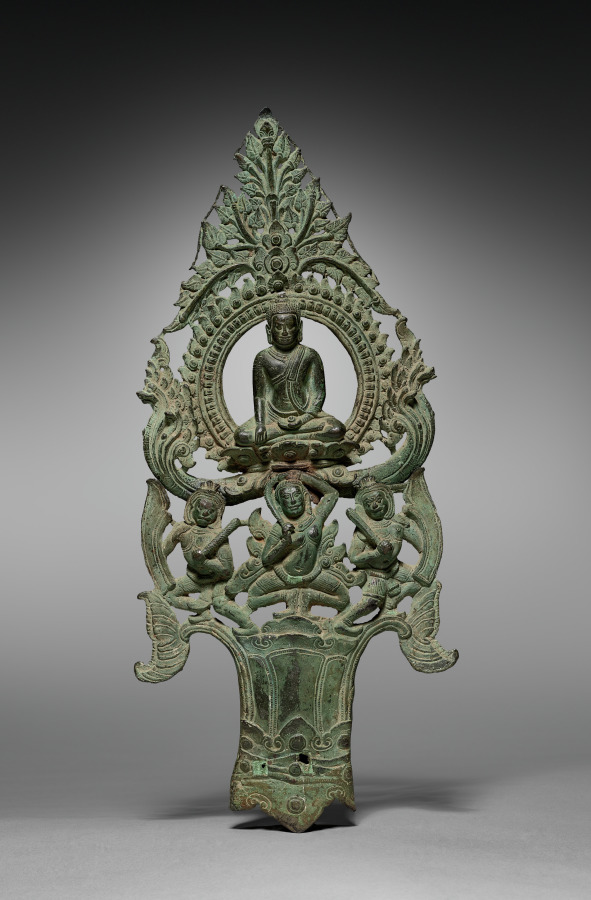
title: Portable icon of Shakyamuni Buddha in the Earth-touching gesture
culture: Cambodia, reign of Jayavarman 7th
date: late 1100s–early 1200s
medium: Bronze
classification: Sculpture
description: The Buddha sits surrounded by a circle of flaming jewels and full-blown lotus petals. Two rearing serpents emblematic of the glory of the Khmer Empire emerge from either side of his lotus pedestal. The Buddha’s right hand points down in the earth-touching gesture, and his left hand holds a round object, probably a special rice offering that indicates the Buddha’s power to ensure ongoing prosperity of the land. The branches of the pipal tree under which the Buddha reached enlightenment top the composition. Beneath his lotus pedestal, the earth goddess wrings the waters from her hair that wash away the army of Mara, the grimacing demons holding clubs and shields who flee to either side.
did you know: Bronze images such as this were used to transfer a sacred presence from one temple to another.